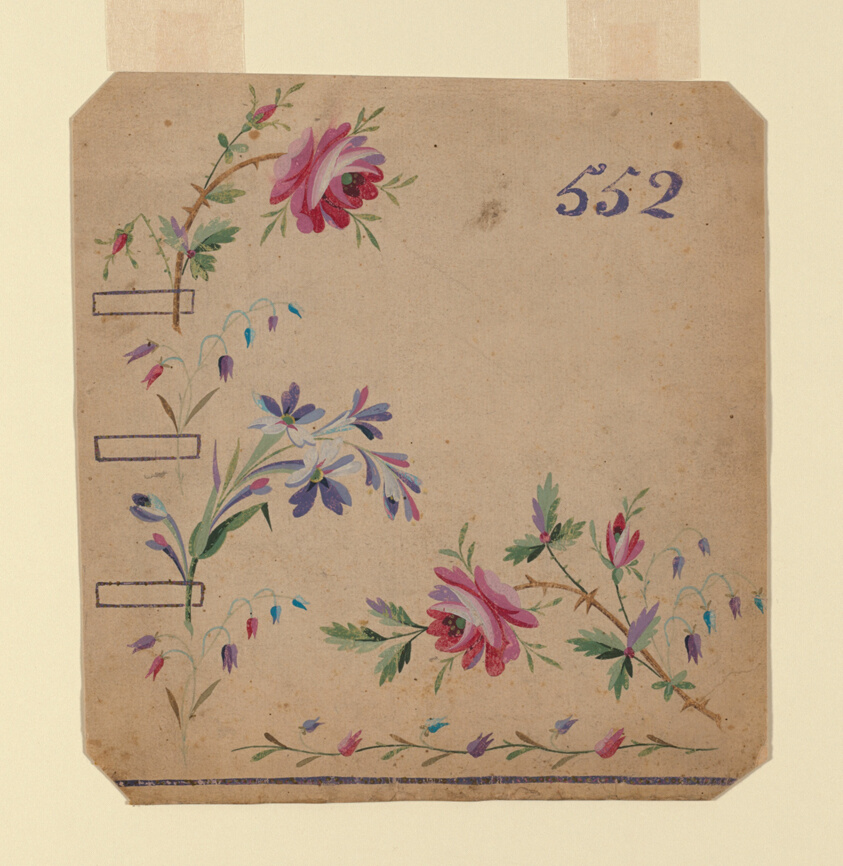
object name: Textile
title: Design for an Embroidered Waistcoat Corner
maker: France, probably Lyon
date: 1780/90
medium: Design on paper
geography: France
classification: textile; accessory - paper design; accessories (object genre)